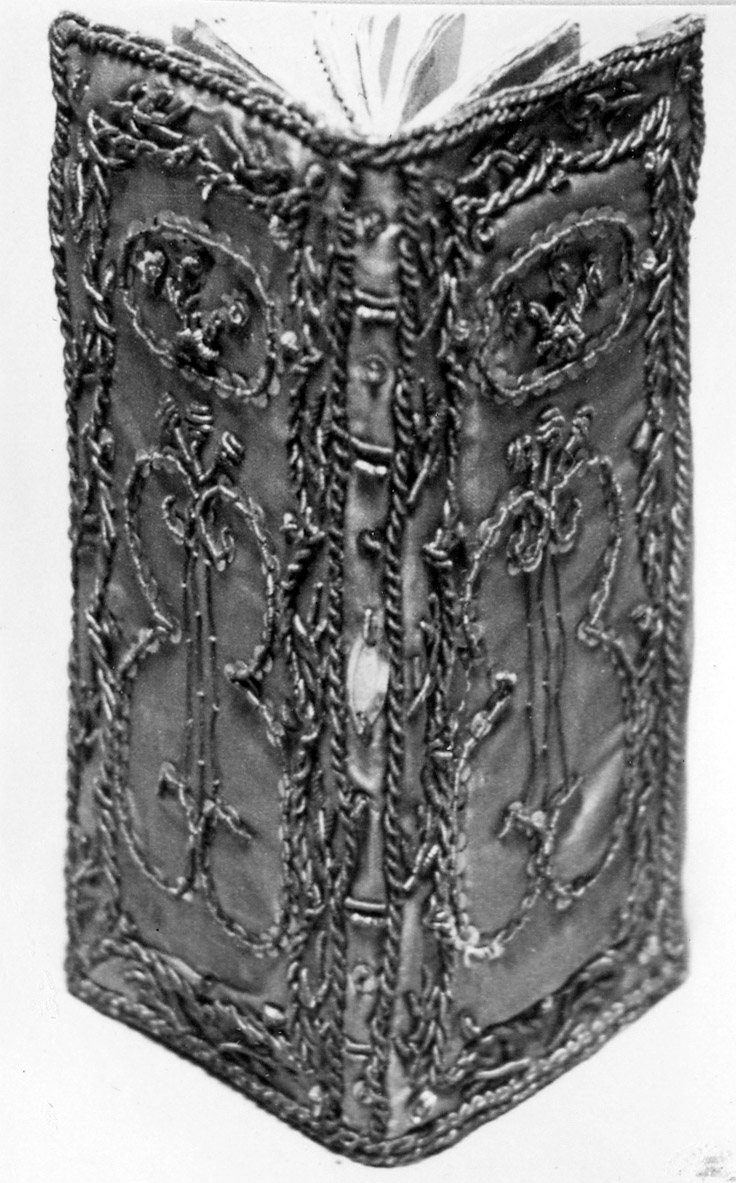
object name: Book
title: Almanac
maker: France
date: 1828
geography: France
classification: textile; book